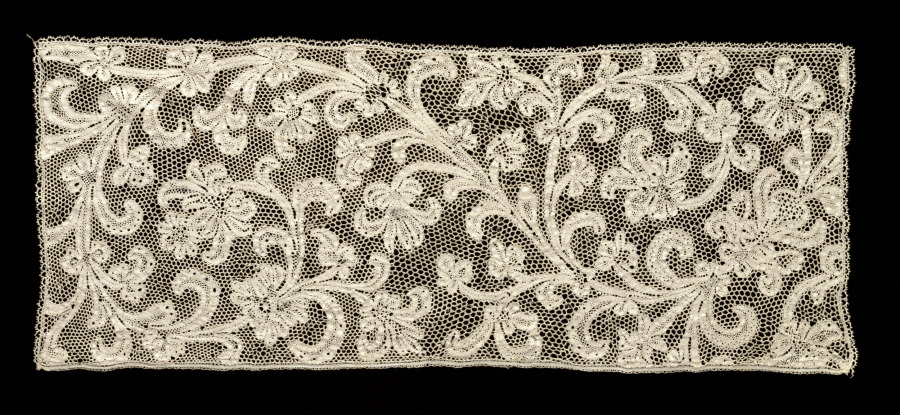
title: Lace Flounce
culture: Italy, Milan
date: 1600s–1700s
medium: Bobbin lace (Punto di Milano)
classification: Lace